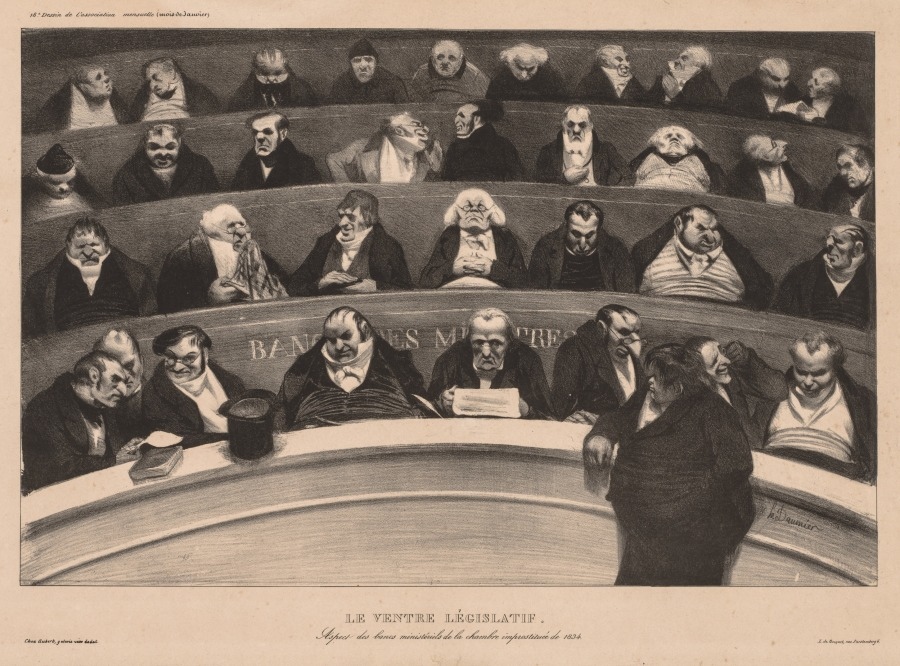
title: The Legislative Belly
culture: France, 19th century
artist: Honoré Daumier (French, 1808–1879)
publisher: Aubert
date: 1834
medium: lithograph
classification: Print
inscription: Below image, printed: LE VENTRE LÉGISLATIF. / Aspect des bancs ministériels de la chambre improstituée de 1834.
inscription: Upper margin, printed: 18e. Dessin de l'association mensuelle (mois de Janvier) ; lower margin, printed: Chez Aubert, galerie véro dodat. / I. de Becquet, rue Furstemberg 6. ; in pencil: Rx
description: This print was published as plate 18 from The Monthly Association (l’Association Mensuelle pour la Liberté de la Presse), a special edition of La Caricature.